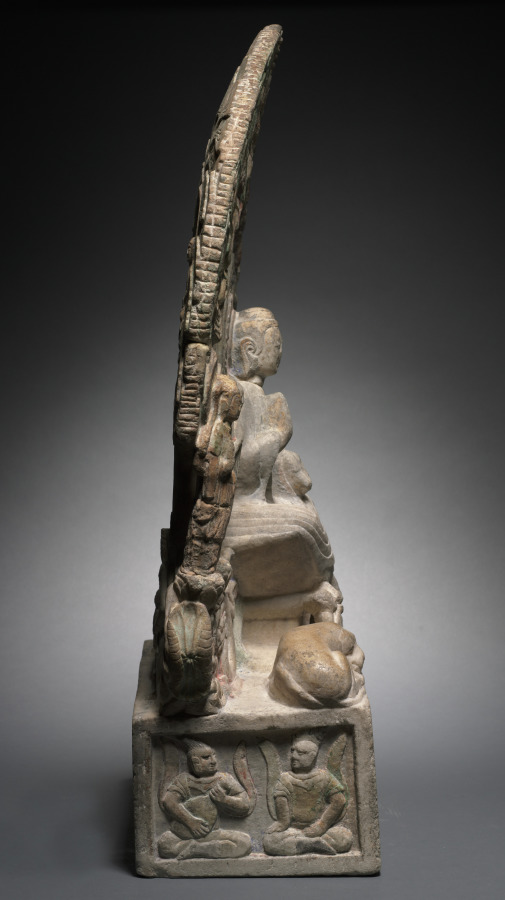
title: Stele: Maitreya as the Future Buddha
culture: China, Hebei, Six Dynasties period (317-581), Northern Qi dynasty (550-577)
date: 300s–500s CE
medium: marble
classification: Sculpture